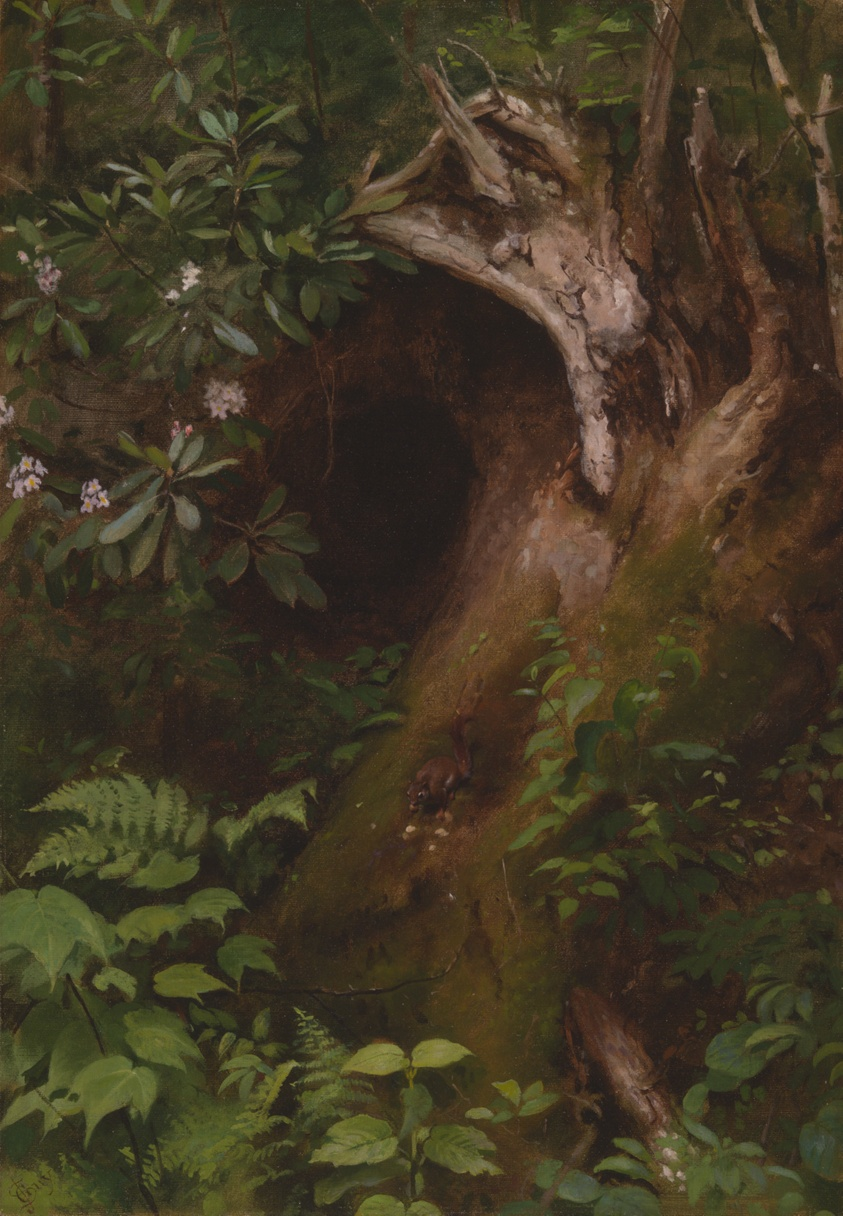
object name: Painting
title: The Squirrel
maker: Seymour Joseph Guy (American, born England, 1824–1910)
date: 1860s–70s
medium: Oil on canvas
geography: United States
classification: painting; american arts